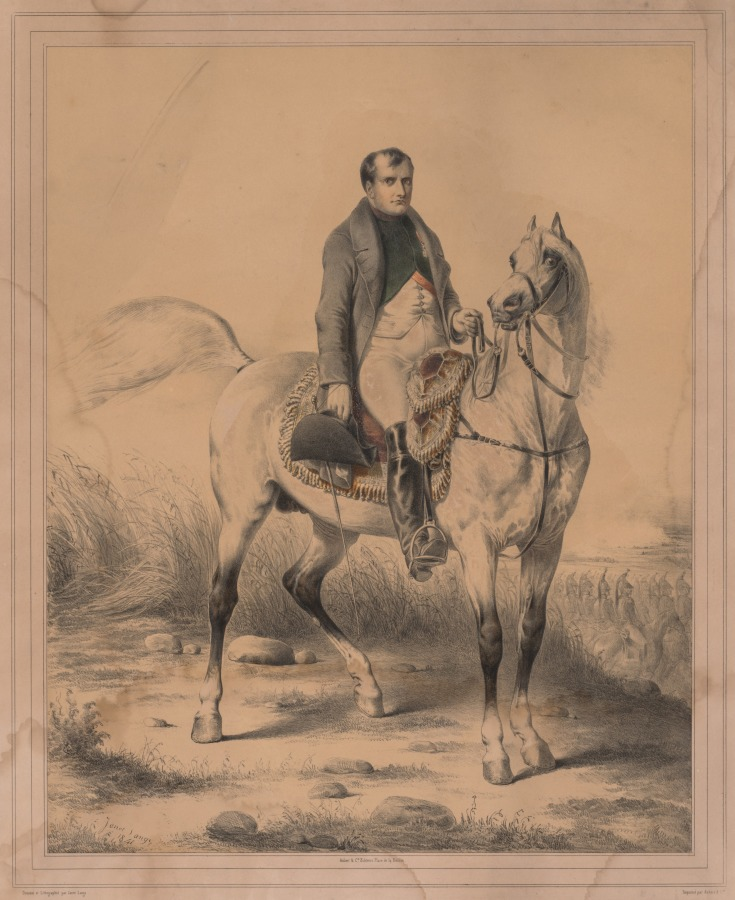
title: Napoleon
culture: France, 19th century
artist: Ange-Louis Janet Lange (French, 1815–1872)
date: 1841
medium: color lithograph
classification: Print